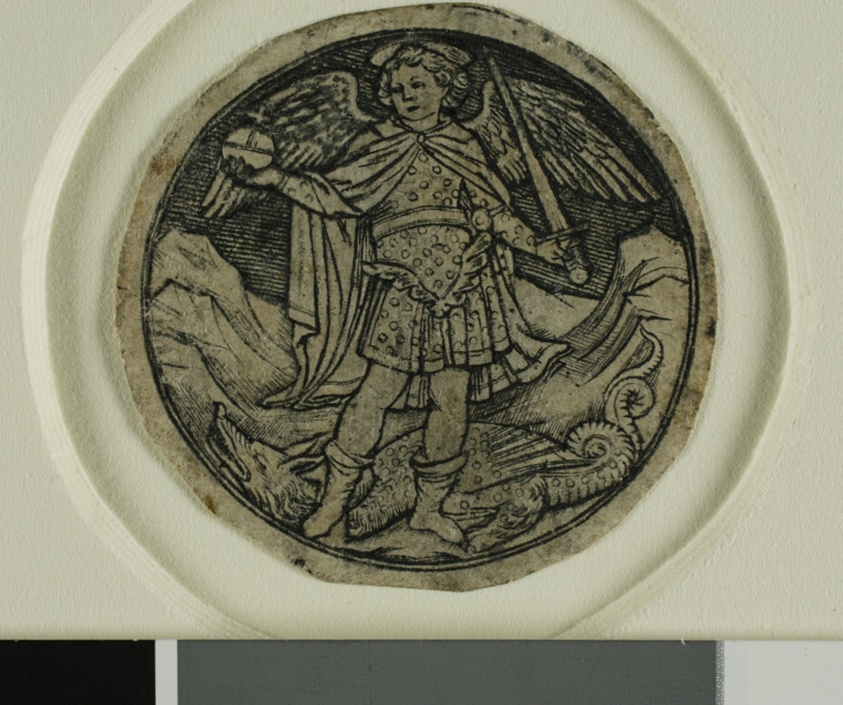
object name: Print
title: Saint Michael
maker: Artist unknown; Florence, 15th/16th centuries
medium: Engraving (niello) in black on tan laid paper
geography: Italy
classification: engraving; print; prints and drawing